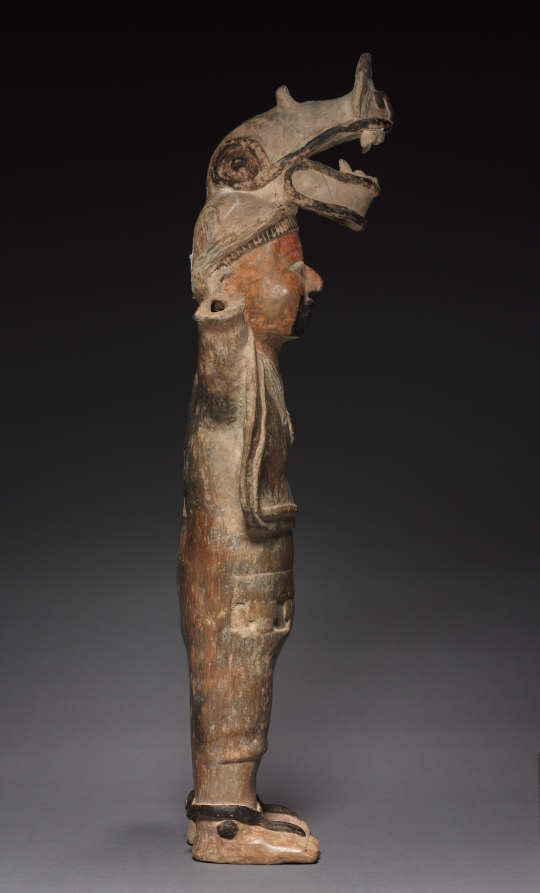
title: Standing Female Figure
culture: Mexico, Veracruz, Veracruz Monumental Sculpture type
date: 600–900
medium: burnished pottery with orange slip, traces of red and white pigment, and asphalt paint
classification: Sculpture